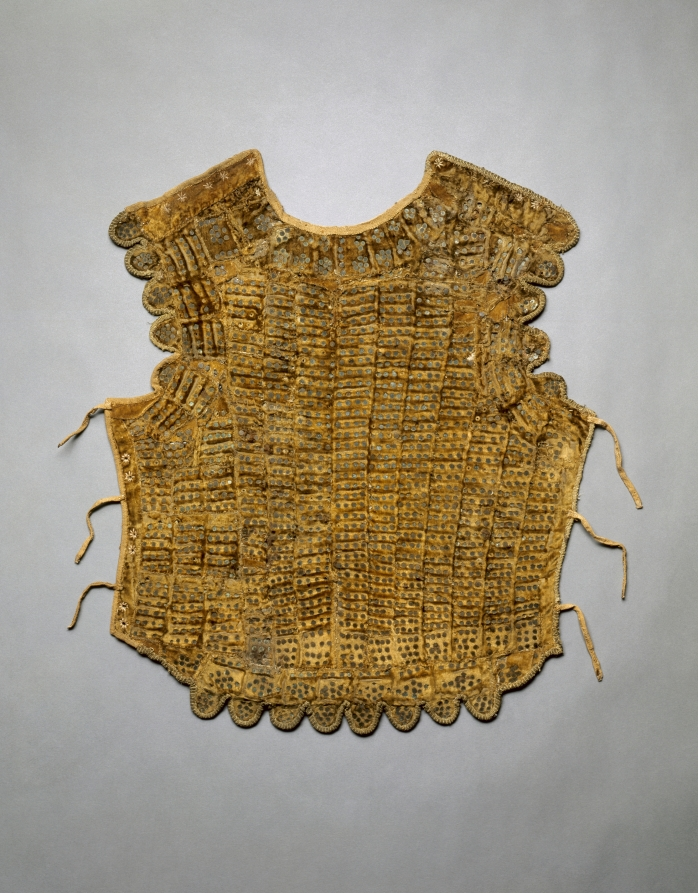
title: Body Guard (Brigandine)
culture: Italy (?), early 16th Century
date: c. 1500–1525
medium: linen; gold velvet; steel; brass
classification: Arms and Armor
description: The brigandine is a light, vest-like body defense popular with both knights and infantry from the 1400s through about 1550. It is constructed of multiple small plates attached to a cloth covering. Finer examples, like this one, are faced in velvet or fabric made of gold thread. The lightweight brigandine provided protection from the weather, and was extremely flexible.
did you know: This vest only weighs about five and a half pounds, considerably lighter than plate armor.